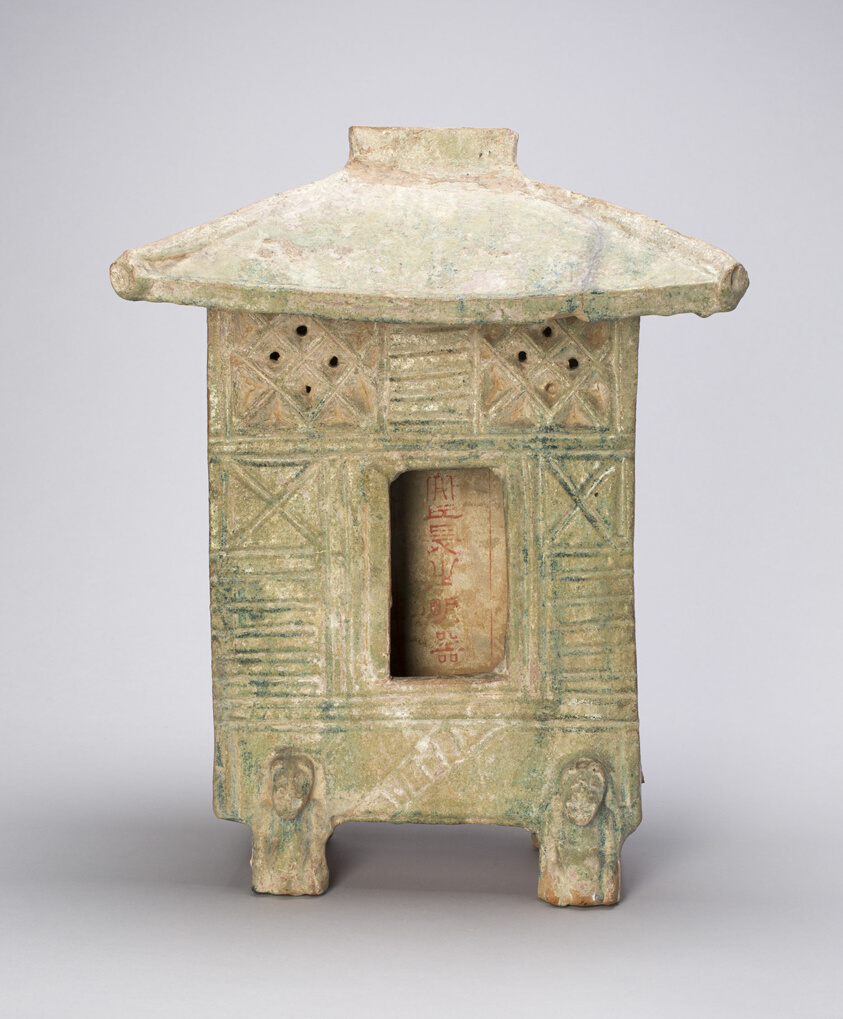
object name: Sculpture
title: Granary (Cang)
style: Chinese (culture or style)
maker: China, probably Henan province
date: Eastern Han dynasty (A.D. 25–220)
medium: Brick-red earthenware with green lead glaze, carved and molded decoration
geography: China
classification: earthenware; ceramics; sculpture; asian art